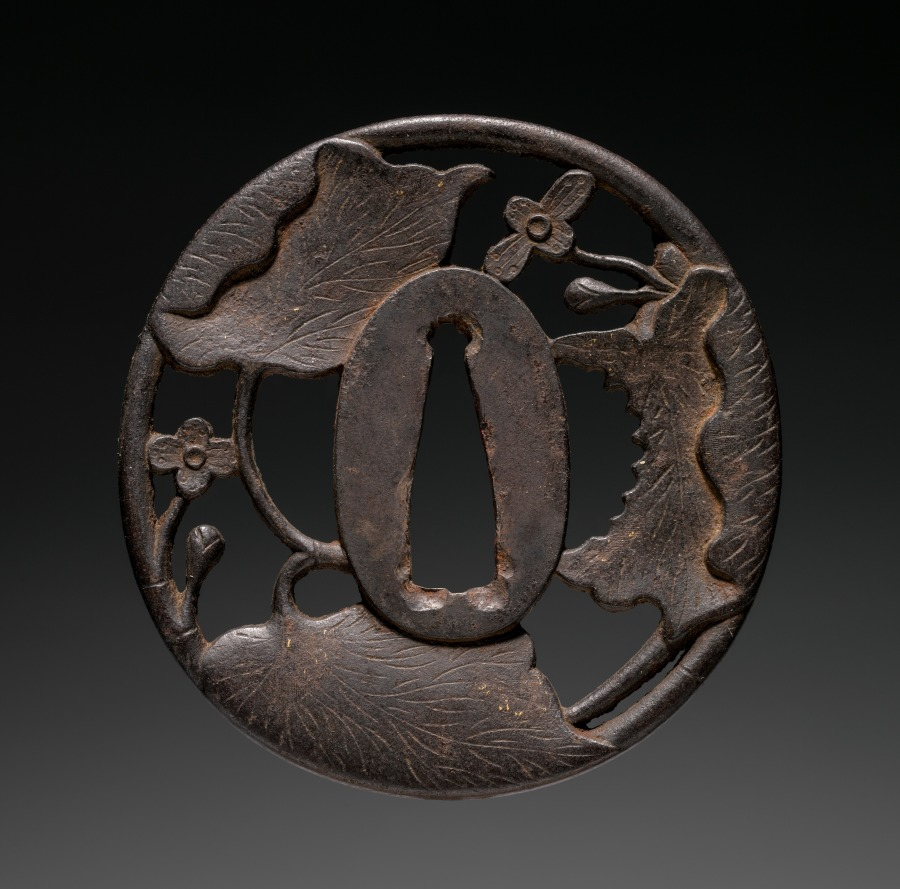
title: Sword Guard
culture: Japan, Edo period (1615–1868)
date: c. 1800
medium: iron (Chosu type)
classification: Arms and Armor